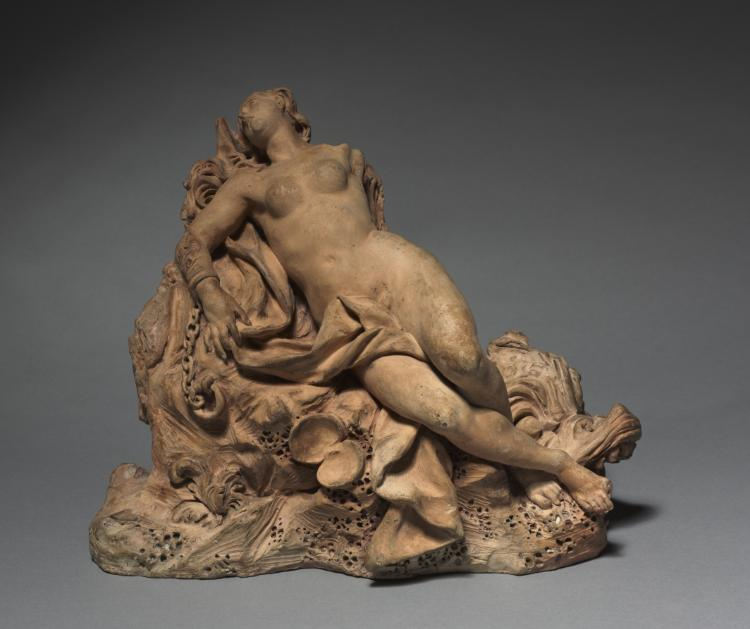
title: Andromeda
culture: Italy, Venice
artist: Antonio Tarsia (Italian, 1663–1739)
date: c. 1720–30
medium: terracotta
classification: Sculpture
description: To stop attacks by a sea monster sent to punish Queen Cassiopeia for bragging that she was more beautiful than the nymphs of the sea, an oracle decreed that her virgin daughter, Andromeda, be tied to a rock and sacrificed to the creature. The hero Perseus would eventually save her, but artists often chose this moment as an opportunity to display a young, nude woman, justified by a veneer of mythology.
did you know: Tarsia sculptred the clay to depict different textures: coral-like rock, smooth skin, and rigid scales.